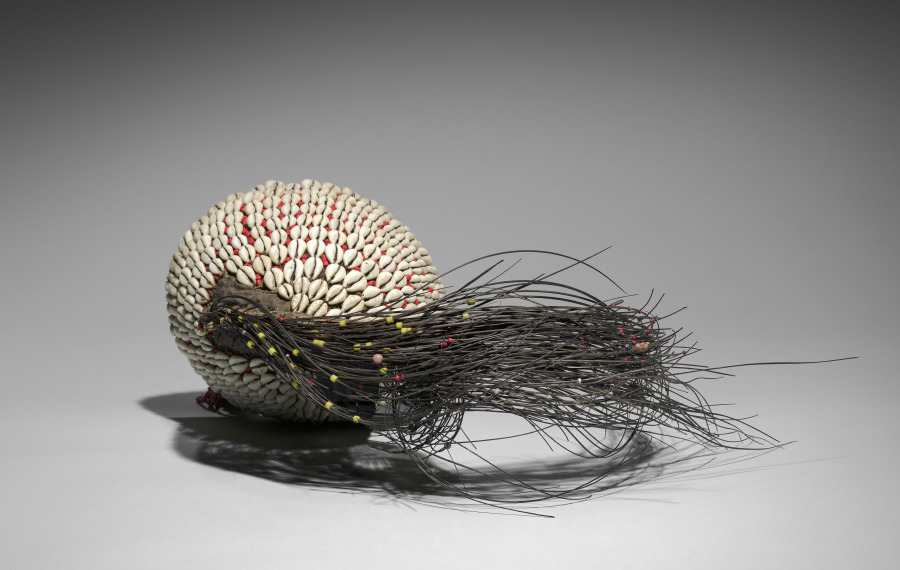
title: Bwami Prestige Cap (Mukuba or Nkumbu)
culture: Africa, Central Africa, Democratic Republic of Congo, Lega-style maker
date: early to mid-1900s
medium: Plant fibers, elephant rawhide and hair, cowrie shells, glass beads, and cord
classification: Garment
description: Hats of different types, sizes, and materials figure prominently in the Lega people’s Bwami association where they indicate status and rank. Cone-shaped hats made of canvas covered with cowrie shells and surmounted by an elephant tail are worn during initiations into kindi, the highest of the five male grades. This prestige cap uses a variety of local and imported materials to show its wearer's importance. The plant fibers that support the hat and the elephant hair were sourced in Central Africa, while the beads and cowrie shells were imported. The beads were made in Europe, while the cowrie shells came from the Indian Ocean region. The might of Bwami members is likened to the elephant’s potentially destructive strength.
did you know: While identified with Africa, cowrie shells were generally imported from the Indian Ocean region. After being collected near the Maldives islands, these Indo-Pacific shells entered parts of Africa via overseas trade routes.